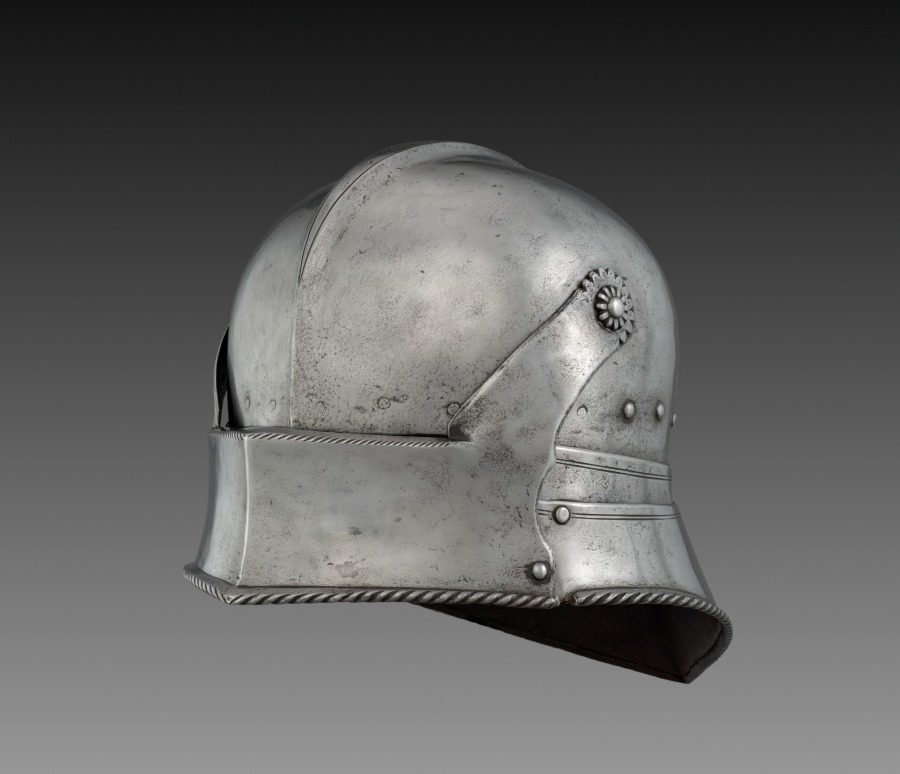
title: Visored Sallet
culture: Germany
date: c. 1490–1500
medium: steel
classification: Arms and Armor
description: The sallet is a partly open-face helmet common in Europe during the 1400s, used in both equestrian and infantry versions. Sallets with movable visors, like this example, are considered to be more technically and visually interesting; beautifully streamlined, it assumes a highly sculptural teardrop shape. Originally it would have been part of a complete suit of armor. The sallet became the quintessential helmet form of the late Middle Ages and is frequently represented in medieval miniatures and woodcuts.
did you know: Medieval sallets were design inspiration for modern-day fireman's helmets.